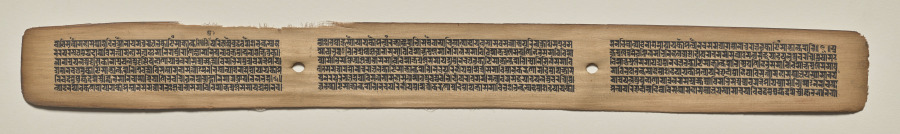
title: Text, Folio 132 (recto), from a Manuscript of the Perfection of Wisdom in Eight Thousand Lines (Ashtasahasrika Prajnaparamita-sutra)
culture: Eastern India, Bihar, Vikramashila Monastery. Painting: Nepal, Kathmandu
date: Sunday, September 14, 1119 (year 239 of the Newar Samvat in the month of Ashvina)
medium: gum tempera and ink on palm leaves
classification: Painting